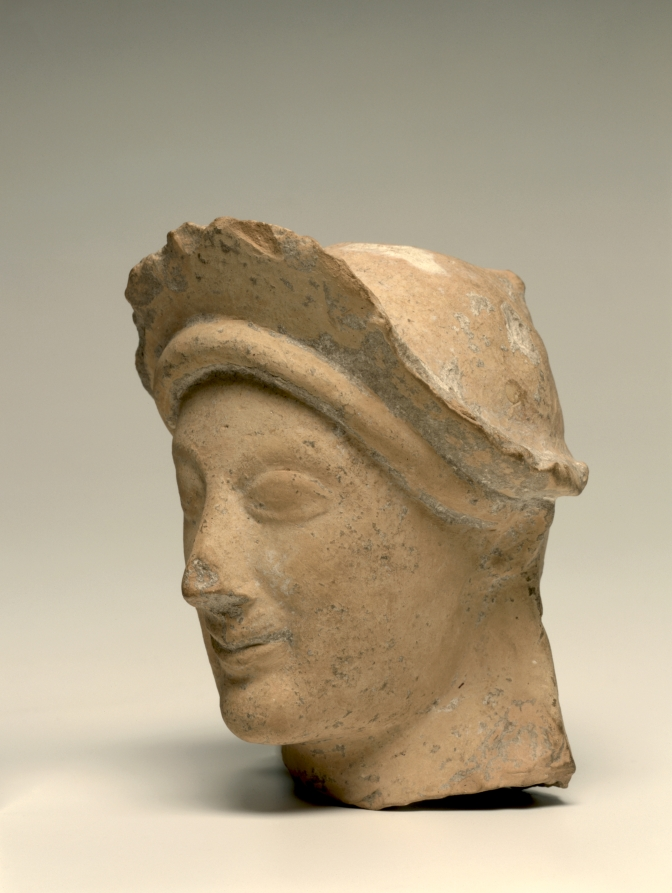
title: Woman's Head with Crown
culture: Greece, Sicily(?)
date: 500s BCE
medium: terracotta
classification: Sculpture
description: This terracotta sculpture depicts a woman with a wide headdress that is partly broken off. Her face is rendered in an Archaic style, with her mouth and eyes in low relief and her lips lifting upward in a serene smile. Originally, details such as the eyes and decoration on the headdress would probably have been painted on the surface of the sculpture.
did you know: In ancient Greek sculpture, a wide crown often denoted a matron deity like Hera or Demeter.